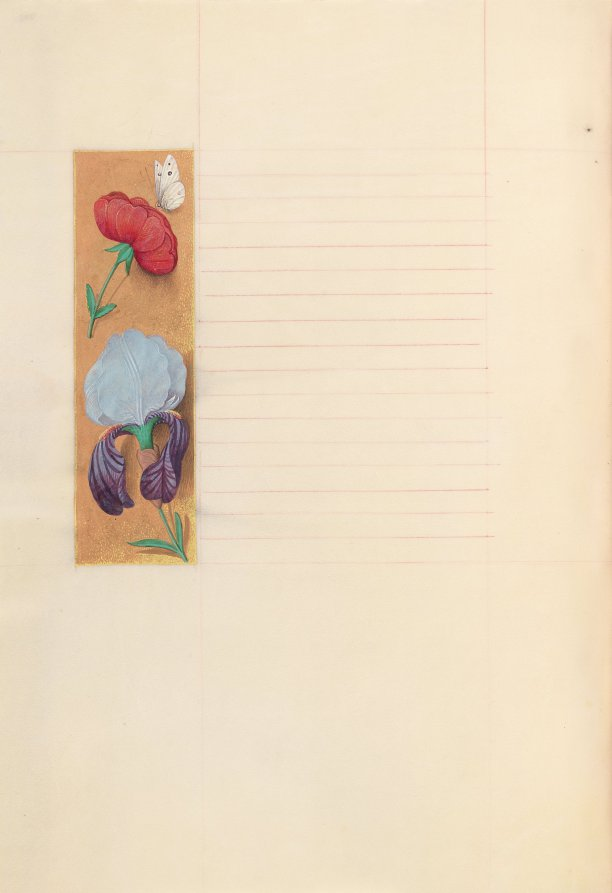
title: Hours of Queen Isabella the Catholic, Queen of Spain: Fol. 273v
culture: Flanders, Ghent and Bruges, late 15th century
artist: Master of the First Prayerbook of Maximillian (Flemish, c. 1444–1519)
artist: and Associates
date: c. 1500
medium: ink, tempera, and gold on vellum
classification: Bound Volume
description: This manuscript was illuminated by a circle of at least five highly organized manuscript painters active in the Flemish cities of Ghent and Bruges. The principal illuminator was Alexander Bening, who painted the majority of the book's miniatures. Manuscripts produced by this circle of artists are renowned for the decoration of their borders, which typically feature a rich variety of realistically-painted flowers, birds, and butterflies. This prayer book, called a book of hours, was intended not for a cleric, but for the private devotions of a lay person-in this case, Isabella the Catholic, Queen of Spain (1451-1504). Isabella's coat of arms embellishes the book's frontispiece. It is unlikely that the book was commissioned by the Queen herself; rather, she probably received it as a diplomatic gift from someone courting her patronage, perhaps Cardinal Francisco Jimenez de Cisneros. A Franciscan friar, Jimenez was dependent upon Isabella for his advancement, first to the post of Queen's confessor in 1492, and then to Archbishop of Toledo in 1495.